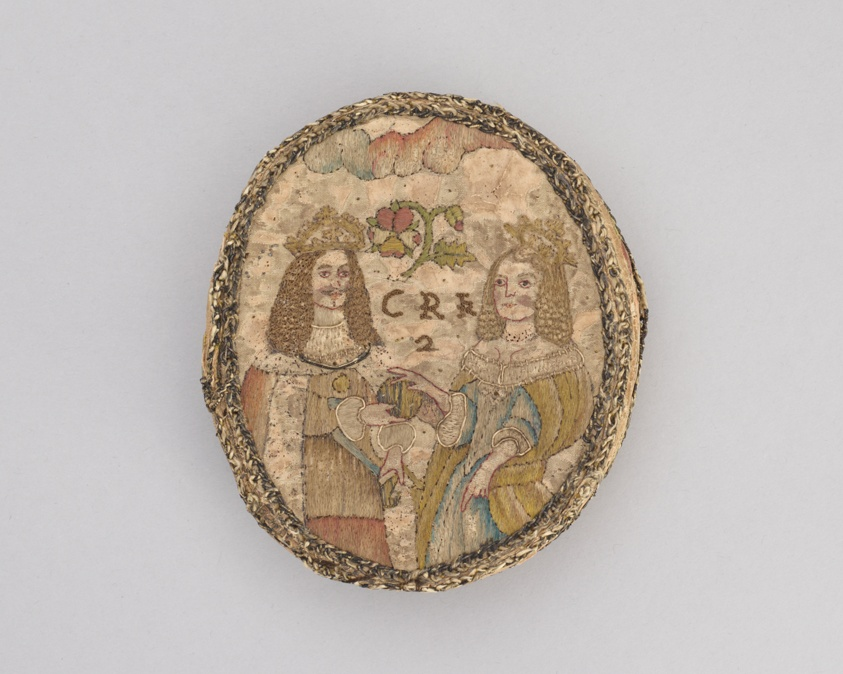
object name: Textile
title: Oval Box Showing Charles II and Catherine of Braganza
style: 17th Century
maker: England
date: c. 1660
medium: Silk, plain weave; embroidered with silk floss foremost in satin stitch; French knots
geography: England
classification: needlework (visual works); textile; portrait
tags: portrait, coat of arms, royalty, crowns, robes, dresses, foliage, snail, butterflies, flowers, botanical/floral, insects